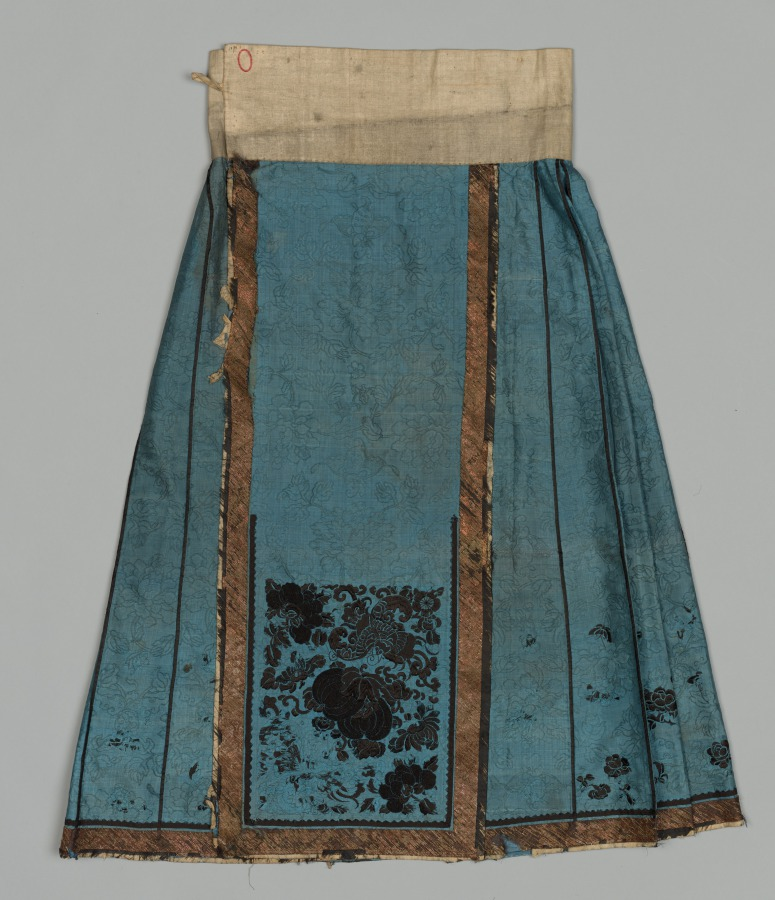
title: Skirt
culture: China, early 20th century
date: early 1900s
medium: satin weave silk (blue) with metal thread embroidery; plain weave cotton ? waistband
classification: Garment